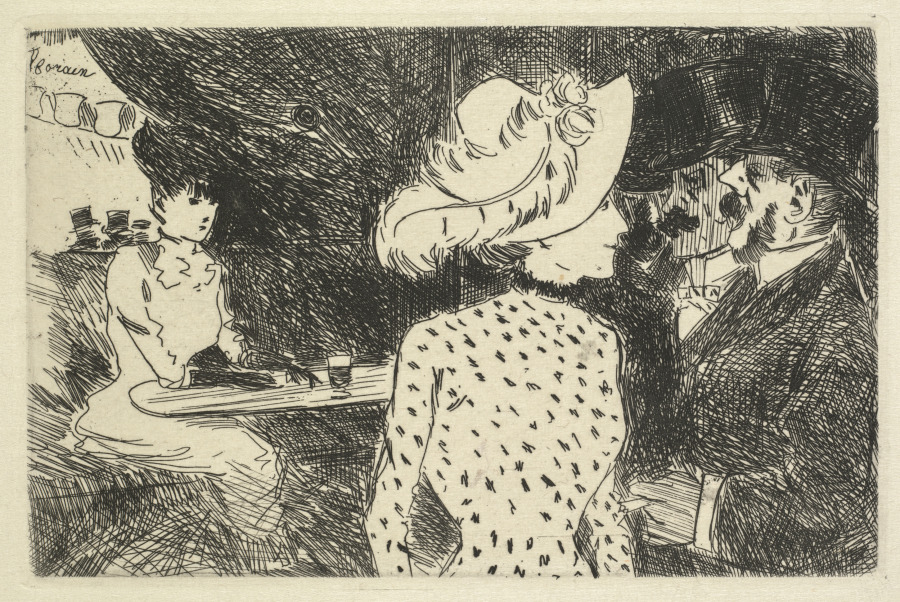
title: Cafe Scene (descriptive)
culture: France, 19th century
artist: Jean Louis Forain (French, 1852–1931)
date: 1880–1886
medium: etching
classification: Print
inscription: signed upper left in plate: forain